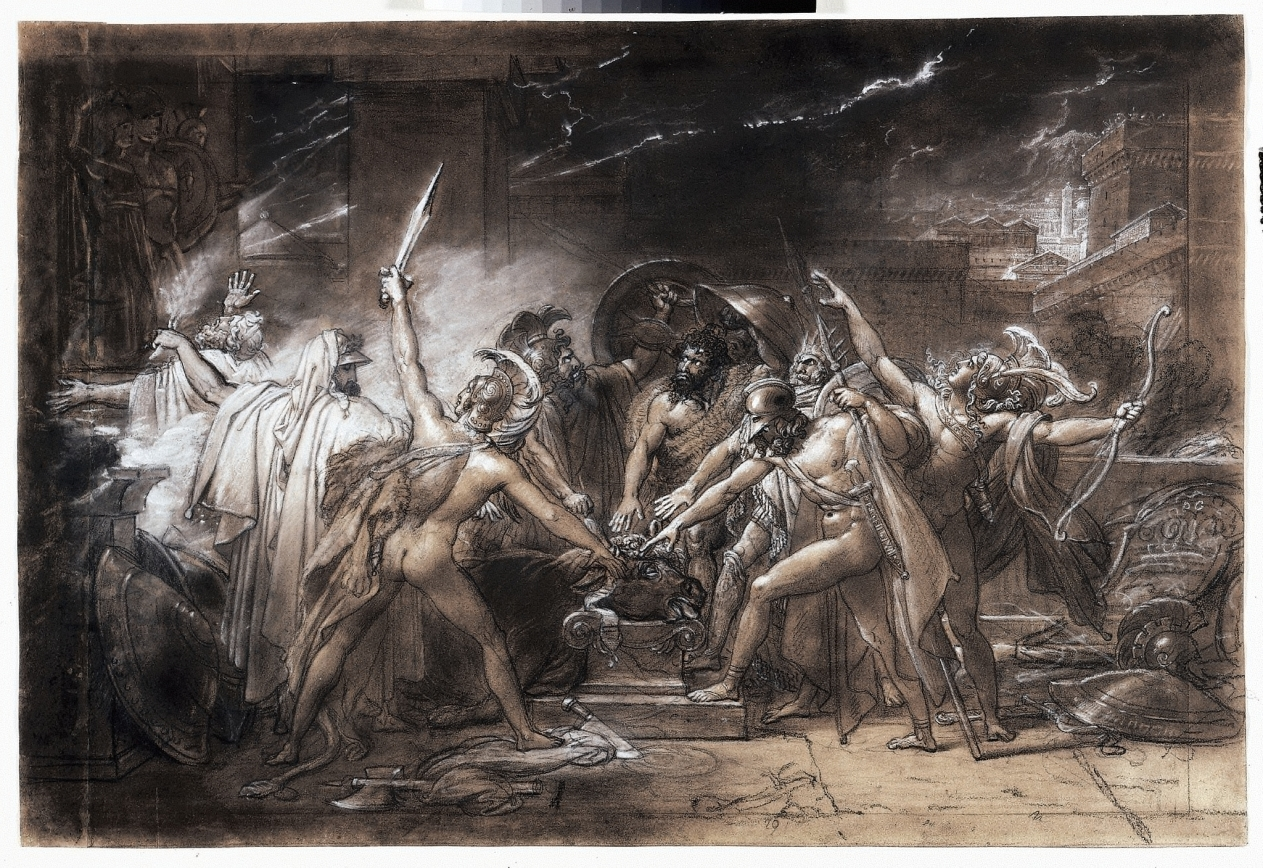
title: The Oath of the Seven Chiefs against Thebes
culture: France, late 18th, early 19th century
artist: Anne-Louis Girodet de Roucy-Trioson (French, 1767–1824)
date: c. 1800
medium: Black chalks and white chalk with stumping and erasing on light brown wove paper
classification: Drawing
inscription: The number 29 (est.) is inscribed along the bottom edge in graphite (over black chalk?)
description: Girodet found inspiration for this drawing in Aeschylus’s Greek tragedy Seven against Thebes. Dramatized with powerful physicality, seven warrior leaders from Argos raise weapons to the war deities Ares and Enyo at the far left as they immerse their hands in the blood of a sacrificed bull, and swear an oath to defeat Thebes. Girodet’s strong black outlines and idealized male nudes are characteristic of Neoclassicism’s calculated restraint. Yet the flash of lightning and the warrior’s impassioned expressions intensify the emotional and psychological content of the scene, anticipating the growth of romanticism in European art during the early 1800s.